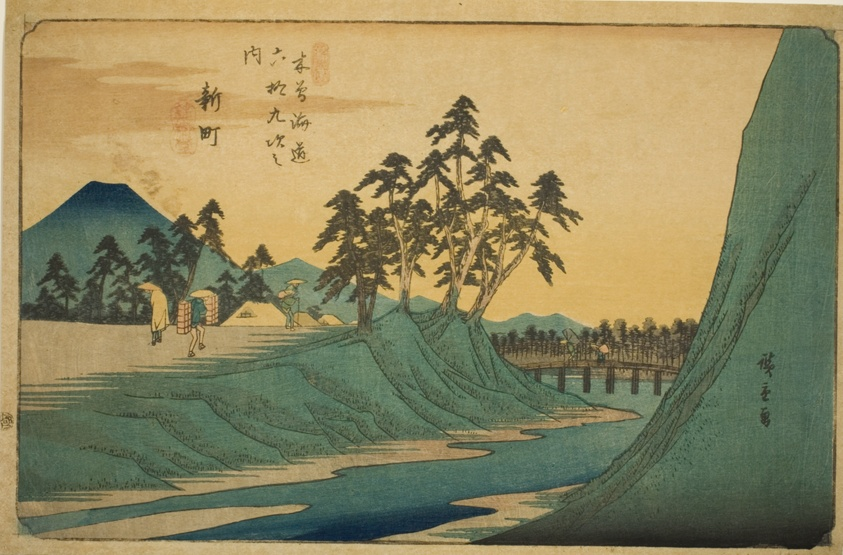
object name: Print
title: No. 12: Shinmachi, from the series "Sixty-nine Stations of the Kisokaido (Kisokaido rokujukyu tsugi no uchi)"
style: Japanese (culture or style)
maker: Utagawa Hiroshige 歌川 広重; Japanese, 1797-1858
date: c. 1835/38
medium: Color woodblock print; oban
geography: Japan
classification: woodblock print; print; asian art